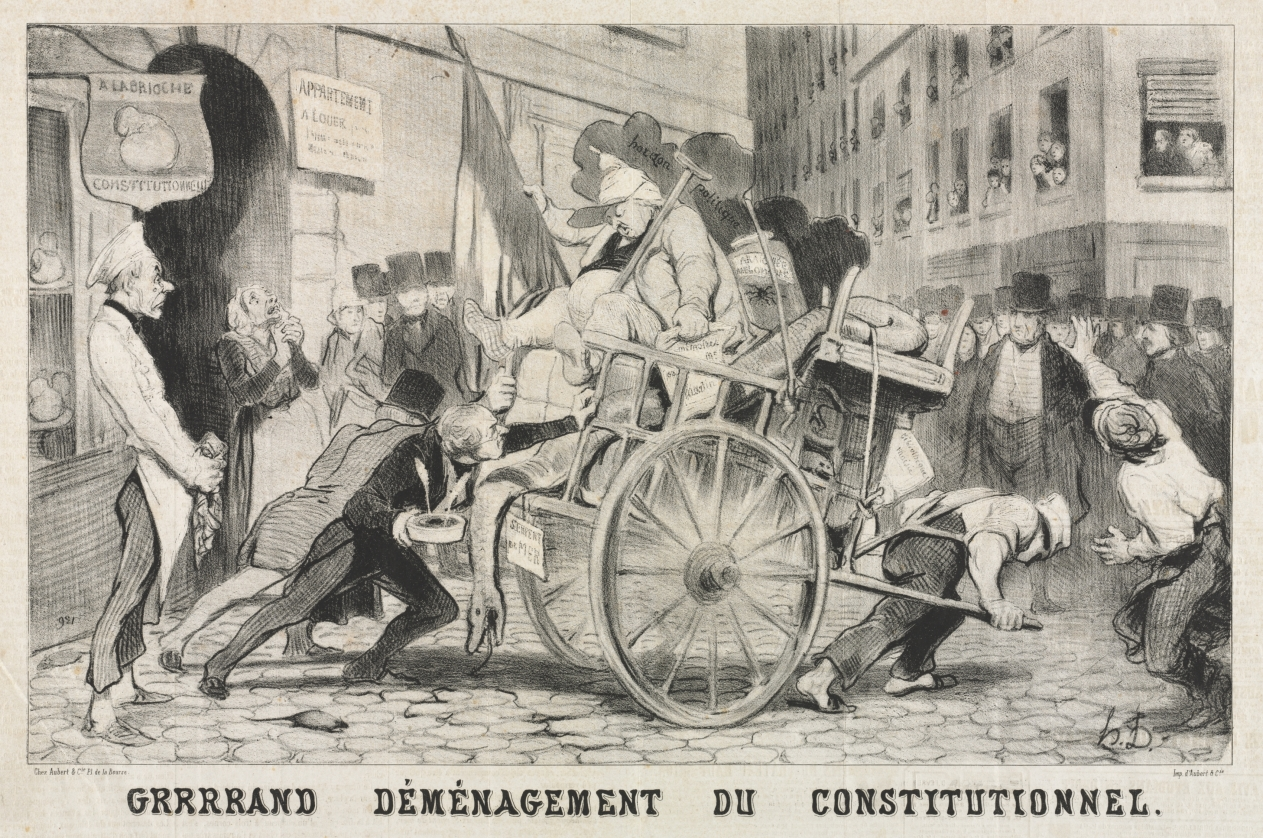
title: Great Removal of the Constitutional Establishment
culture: France, 19th century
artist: Honoré Daumier (French, 1808–1879)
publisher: Aubert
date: 1846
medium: lithograph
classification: Print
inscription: Below image, printed: GRRRRAND DÉMÉNAGEMENT DU CONSTITUTIONNEL.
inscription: Upper margin, in pencil: HD. 459 DH1475 ; lower margin, printed: Chez Aubert & Cie Pl. de la Bourse / Imp. d'Aubert & Cie. ; lower margin, in pencil: Pub. in Charivari 8 June 1846 D.V. 1475 - II/II ; verso, stamp: TIMBRE[?] ROYAL SEINE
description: This print was published in the journal Le Charivari on June 8, 1846.